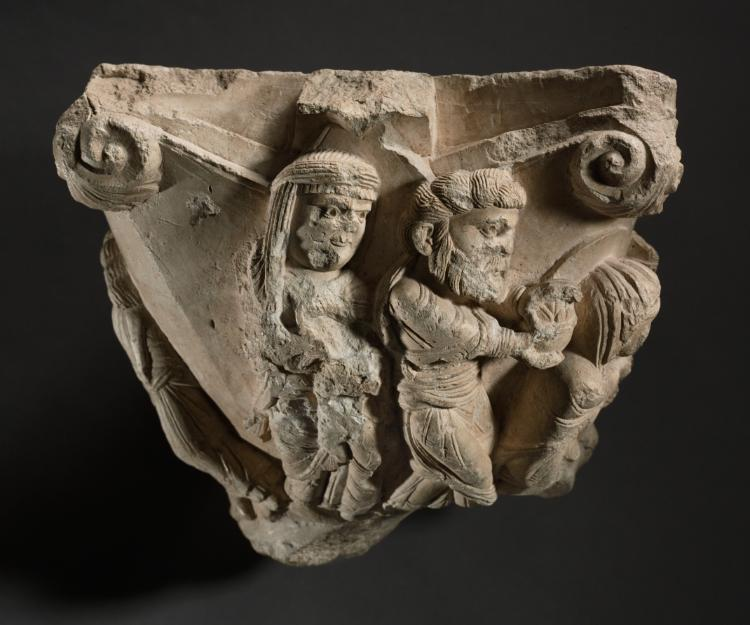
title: Fragment of a Capital with Scenes from Mary’s Infancy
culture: South Italy, Apulia, early 12th Century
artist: workshop of The Cathedral of Monopoli (Italian)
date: early 1100s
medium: fine-grained limestone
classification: Sculpture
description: This sculpture relates stylistically with architrave figures from the facade of Monopoli’s cathedral. It is especially similar to a capital there featuring the prophet Daniel. The figure pouring water on the left probably represents an attendant in the Birth of the Virgin. The remaining figures depict the subject of the Presentation of the Virgin in the Temple. Their exquisite sculptural character gives this fragment major importance in the study of Romanesque sculpture in Apulia.